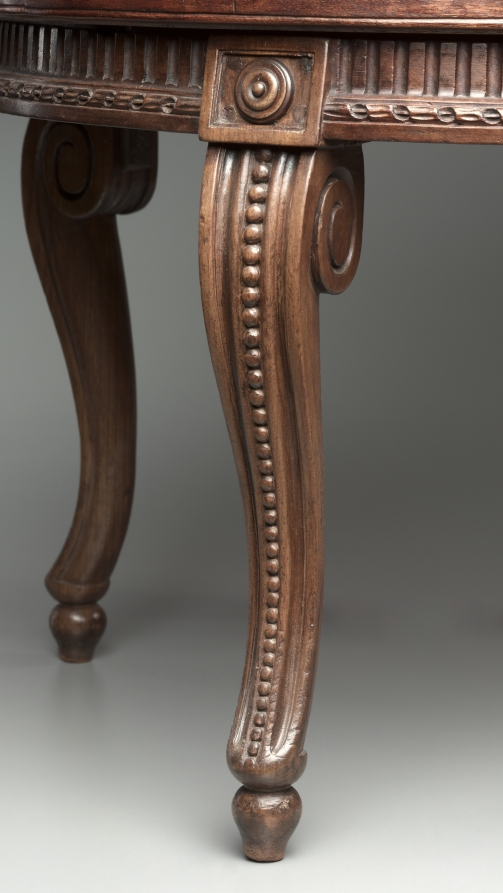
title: Desk Chair with Swivel Mechanism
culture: France, Paris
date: c. 1780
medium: walnut with caning and leather upholstery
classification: Furniture and woodwork